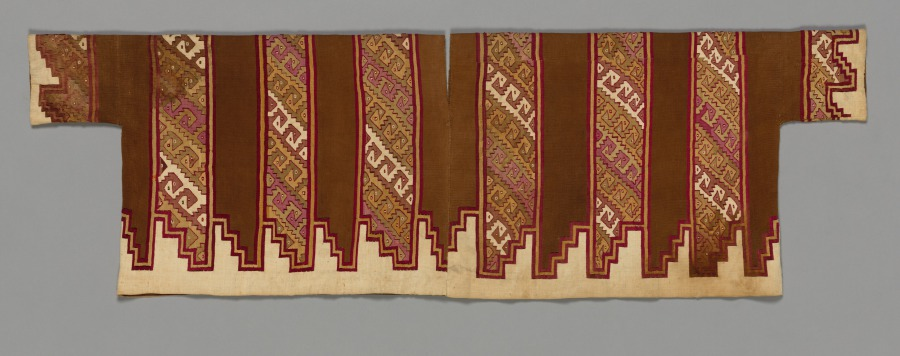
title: Sleeved Tunic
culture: Central Andes, central coast, Chancay people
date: 1460s–1532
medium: Cotton, camelid fiber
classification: Textile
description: The Chancay (chan-kai) people of Peru’s central coast created one of the ancient Andes’s best-known textile legacies through artistically elaborate men’s tunics and loin cloths, women’s dresses and headcloths, and shawl-like mantles. Two traits indicate that this tunic is a high-prestige garment: its labor-intensive tapestry-woven technique and its substantial use of alpaca fiber imported from the adjacent highlands.